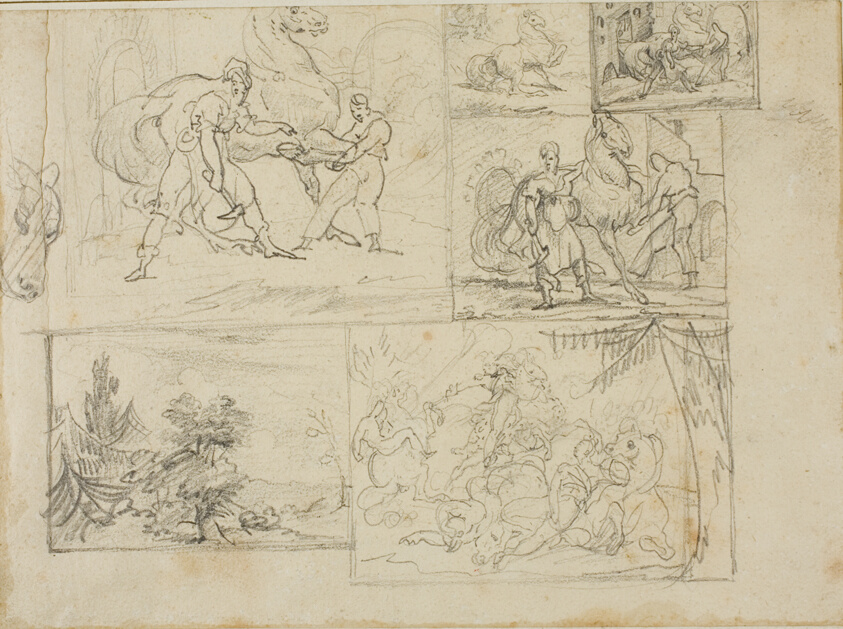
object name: Drawing and Watercolor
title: Three Studies with Sketches of a Wooded Landscape and a Cavalry Battle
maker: Jean Louis André Théodore Géricault (French, 1791-1824)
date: 1813/14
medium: Graphite, on cream wove paper, perimeter mounted on ivory laid paper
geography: France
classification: graphite; drawings (visual works); prints and drawing